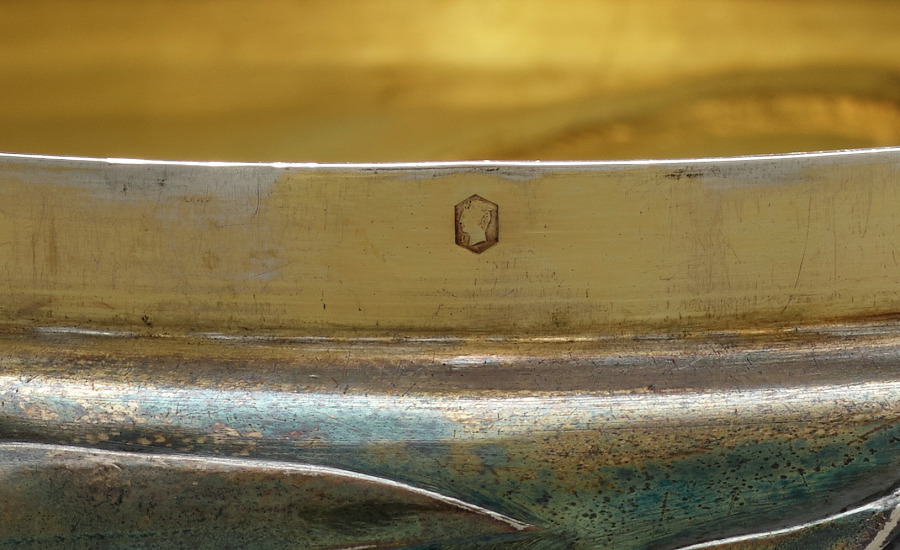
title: Box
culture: Sweden, 19th century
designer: Ingeborg Plockross-Iminger (Danish, 1872–1962)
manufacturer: Bing & Grøndahl (Danish, est. 1853)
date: c. 1850–1900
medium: porcelain, silver-gilt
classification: Sculpture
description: This figure featuring three monkeys was designed by the Danish ceramicist Ingeborg Plockross-Iminger. The figure is displayed with a French silver mount that references Japonisme and Art Nouveau styles that were popular at the end of the 1800s and experienced a resurgence in the 1920s because of increased importation of Japanese goods to the West.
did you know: This ceramic figure usually stands alone, without a silver mounting.